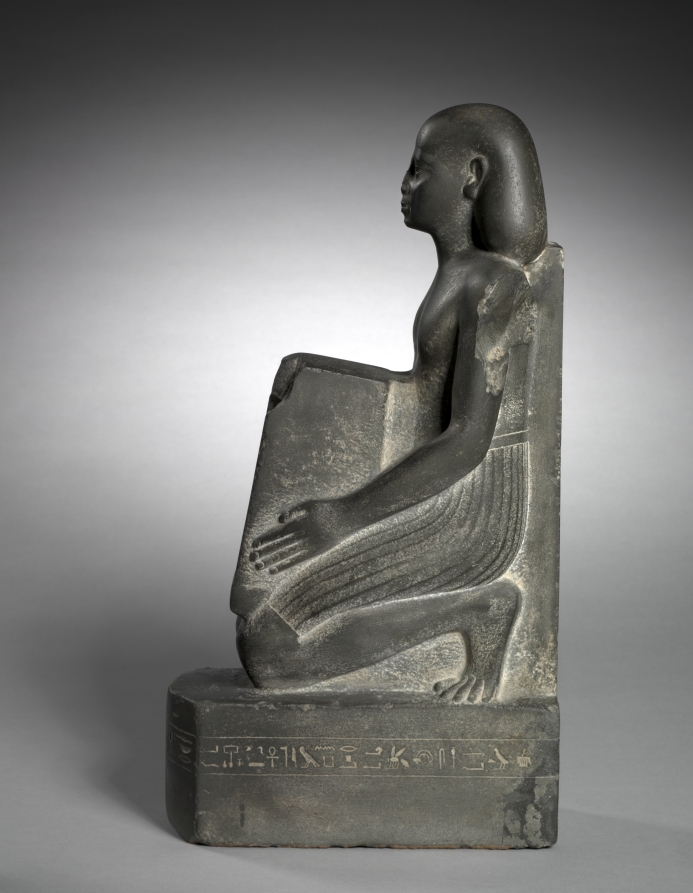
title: Naophorous Statue of the Finance Officer and Overseer of Fields, Horwedja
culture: Egypt, Late period (715–332 BCE), Dynasty 27, reign of Darius I (522–486 BCE)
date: 521–486 BCE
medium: graywacke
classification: Sculpture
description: Naophorous (naos.bearing) statues show the subject holding a naos, or shrine, containing an image of a deity, in this case the god Ptah of Memphis. These statues were very popular during the Late Period. Almost invariably they are of hard stone, made to last for eternity. As finance officer under Darius I, Horwedja was in a good position to afford such a monument. Darius I was the second Persian king to rule over Egypt and the only one who seems to have had a genuine appreciation of the country. Egypt prospered under his rule, and the arts flourished.